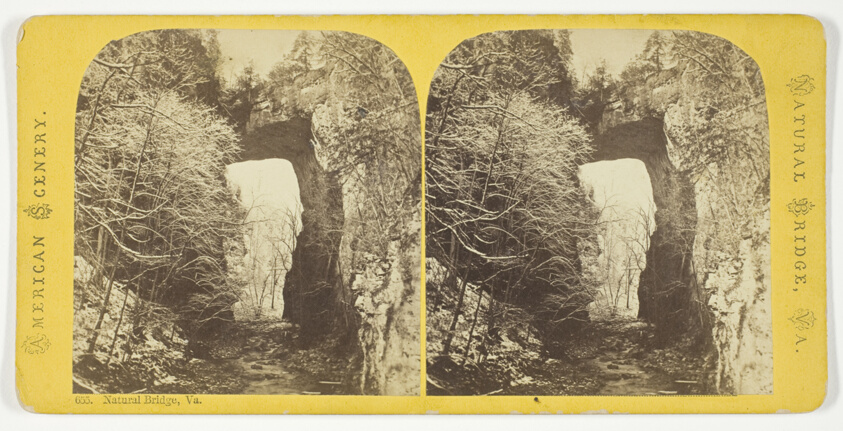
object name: Photograph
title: Natural Bridge, VA, No. 655 from the series "American Scenery"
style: 19th century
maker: Artist unknown; American, late 19th century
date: 1875/99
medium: Albumen print, stereo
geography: Virginia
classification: photography; photograph